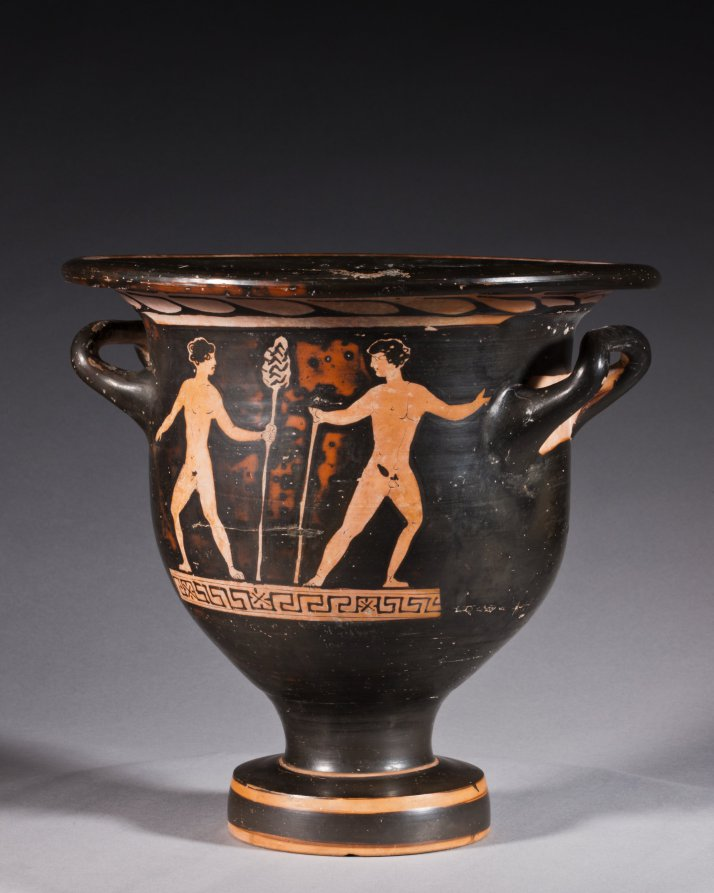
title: Red-Figure Bell Krater (Mixing Vessel): Aphrodite and Eros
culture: South Italian, Apulian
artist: attributed to Graz Painter (South Italian, Apulian, active c. 380–360 BCE)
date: c. 370–360 BCE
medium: ceramic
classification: Ceramic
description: This small mixing vessel shows a finely dressed woman seated on a chest and holding up a mirror to admire herself. Before her stands Eros, the winged god of love, holding a ribbon or sash. Behind the woman stands a pillar with the inscription ΑΦΡΟΔΙΤΗ, or APHRODITE, the goddess of love. Such labels are rare on vases, and scholars debate whether this names the woman shown as Aphrodite herself, with her son Eros, or a bride envisioning herself as Aphrodite, just before her wedding.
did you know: The dancing nude youths on the reverse are unusual; typically they would be standing and draped.